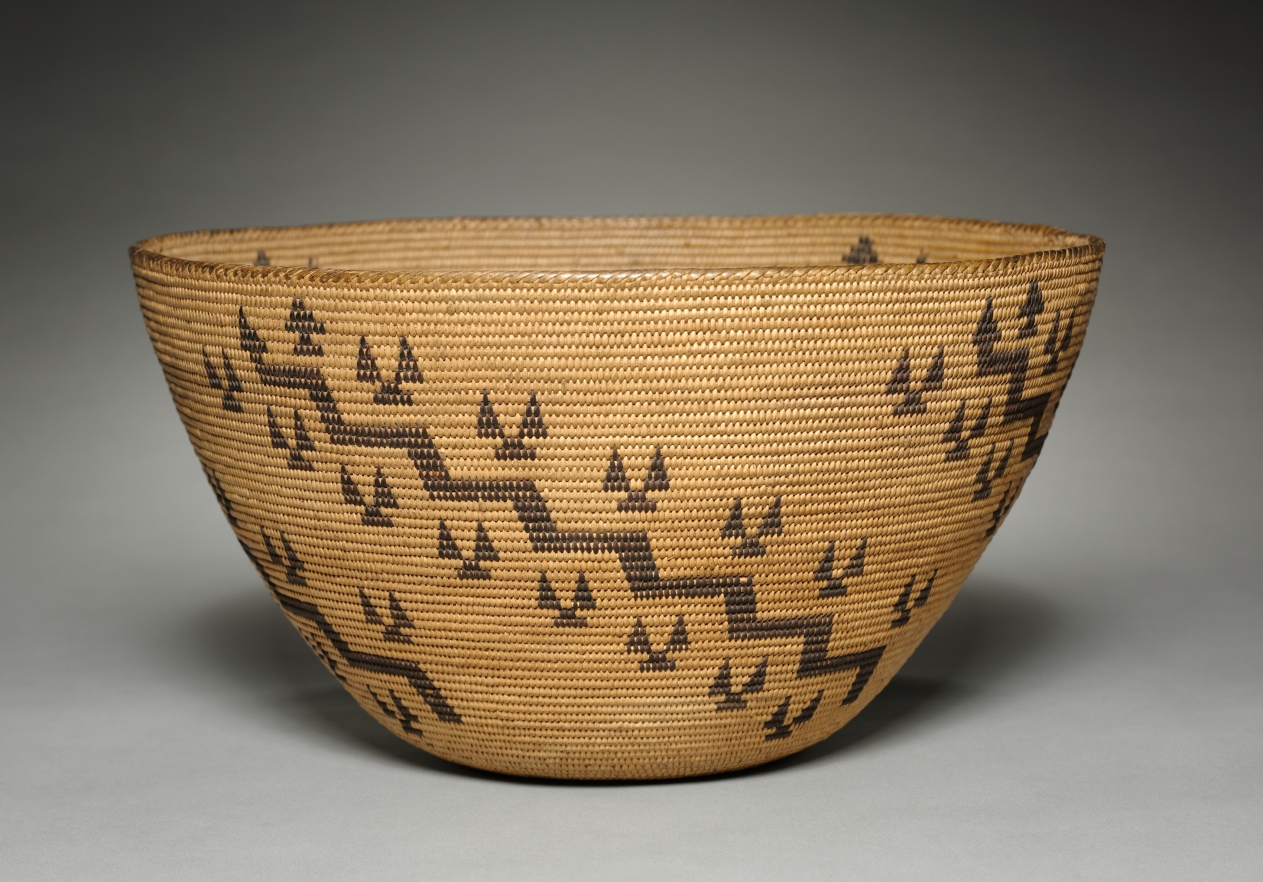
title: Cooking Bowl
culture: California, Mono, Lake Paiute, late 1800s–early 1900s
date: 1890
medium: willow, bracken fern; coiled (3 rods)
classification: Basketry